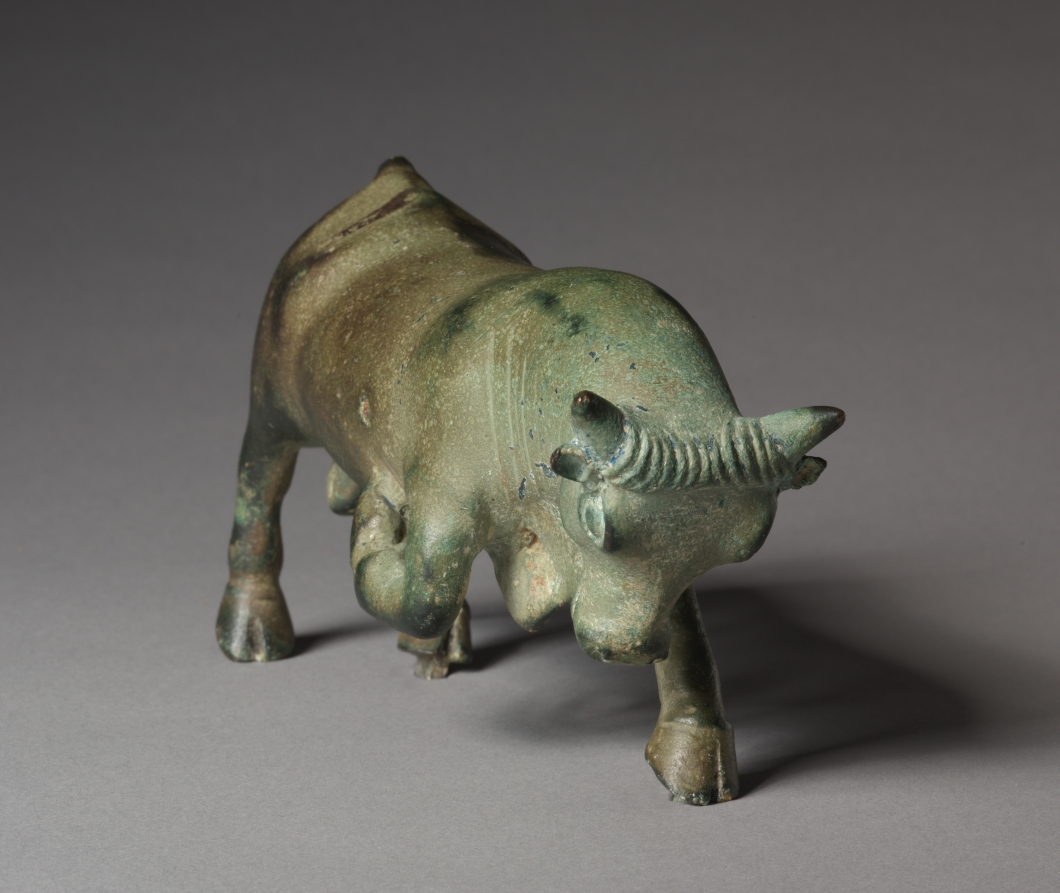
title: Pawing Bull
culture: South Italy, Lucania, Greek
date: 500–475 BCE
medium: bronze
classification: Sculpture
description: With its head slightly lowered and right foreleg raised in a pawing motion, this robust bull seems poised for action. The pose closely resembles that of bulls on coins minted at Thurii, a Greek colony in South Italy, but the statuette seems earlier in date and could have other associations. Perhaps the bull once carried the princess Europa, for example, or battled a lion or a hero. Alternatively, it may have stood alone as a small-scale offering, representing the actual bulls sometimes sacrificed to deities.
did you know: This solid-cast bronze bull is nearly intact, missing only its tail.